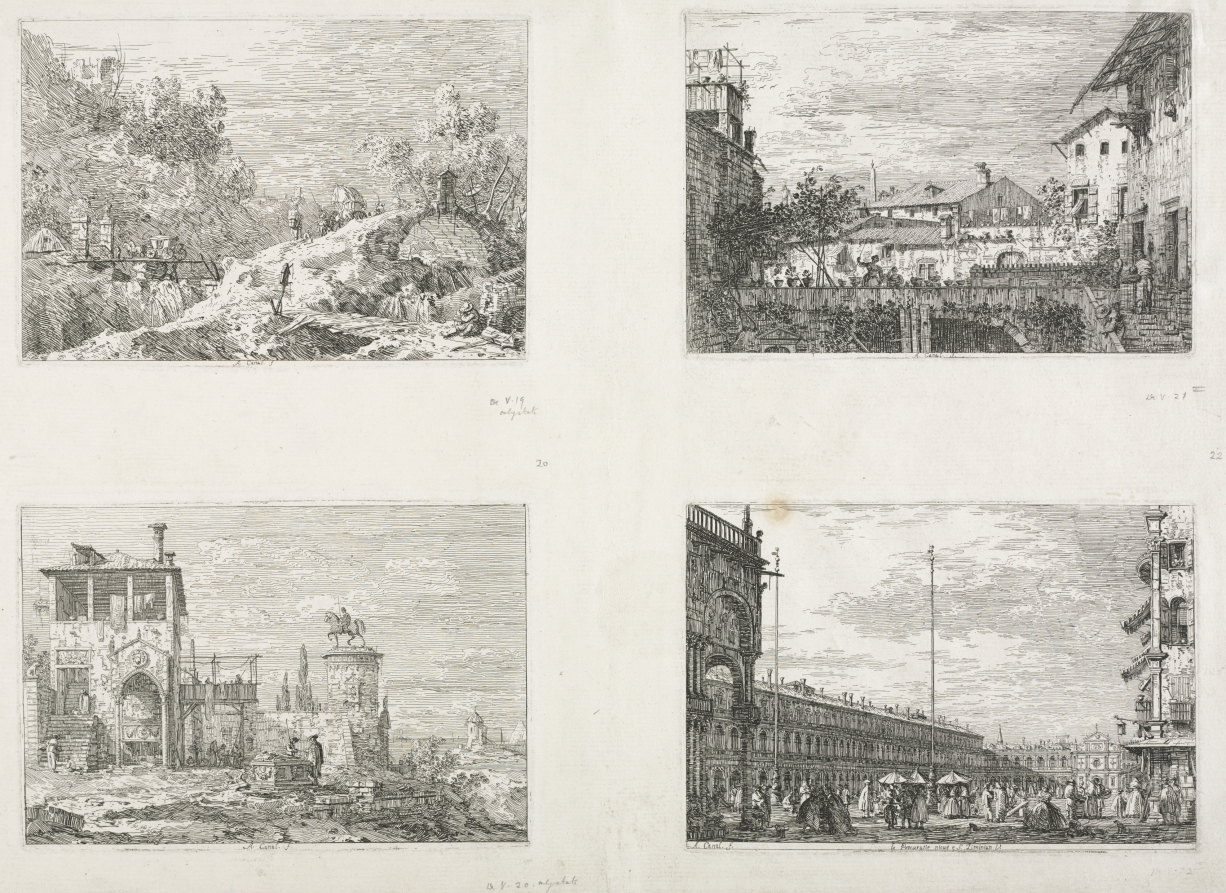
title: Views: The Terrace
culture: Italy, Venice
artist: Antonio Canaletto (Italian, 1697–1768)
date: 1735–1746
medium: etching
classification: Print